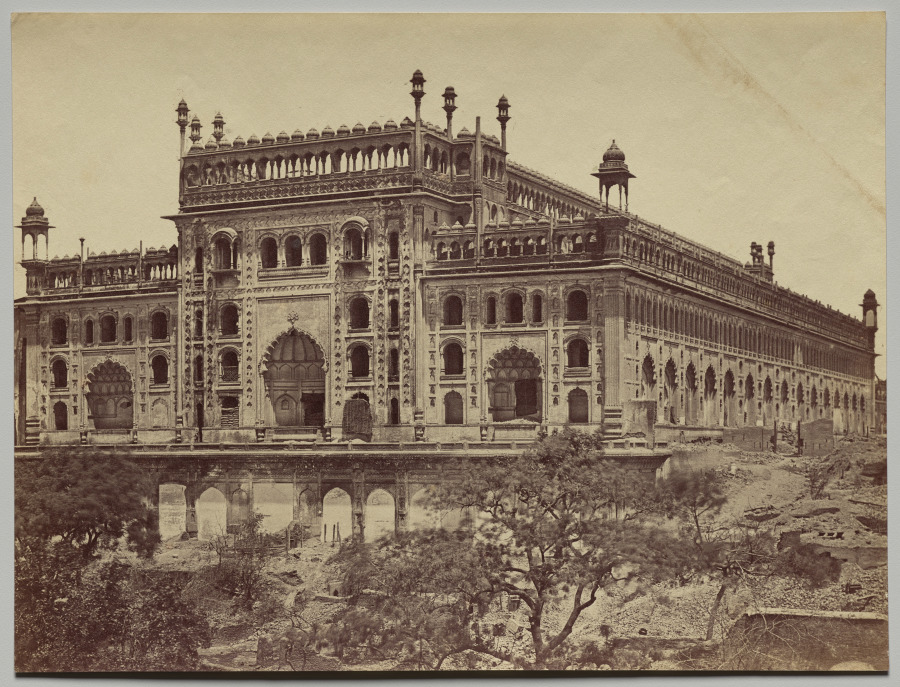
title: Exterior of Asaf-ud-Daula's Imambara, or Tomb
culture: England, 19th century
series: Lucknow After the Siege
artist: Felice A. Beato (British, 1832–1909)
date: 1858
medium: albumen print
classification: Photograph